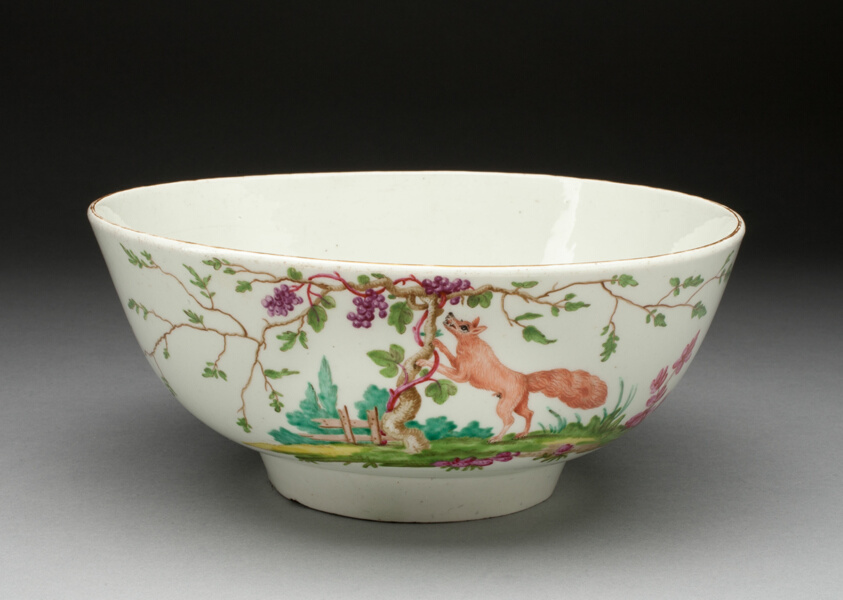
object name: Ceramics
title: Punch Bowl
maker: Worcester Porcelain Factory (Warmstry House Period, 1751–1783); Worcester, England, founded 1751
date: c. 1770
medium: Soft-paste porcelain, polychrome enamels and gilding with fox and grapes of Aesop's Fable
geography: Worcester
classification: punch bowl; bowl; ceramics; porcelain; european decorative arts